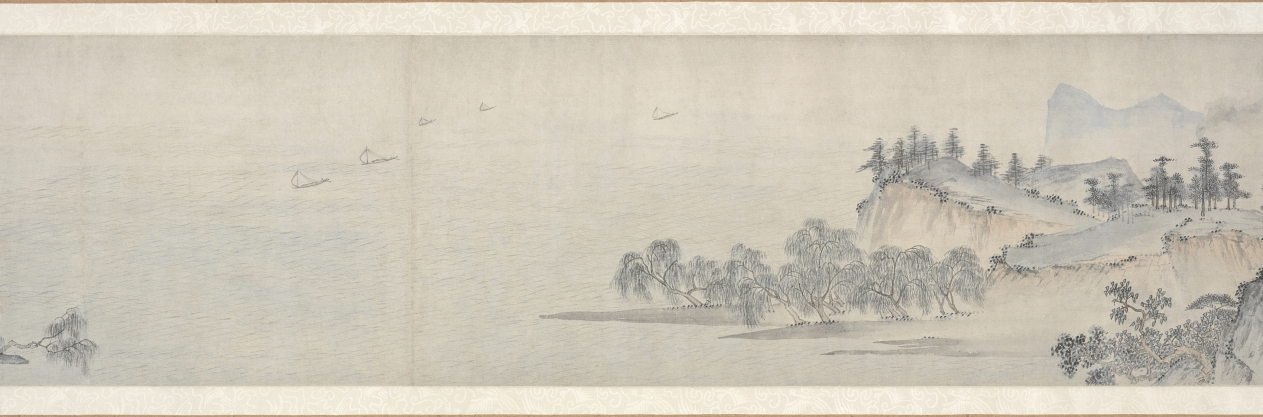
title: Ten Thousand Li of the Yangzi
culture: China, Ming dynasty (1368–1644)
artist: Dai Jin (Chinese, 1388–1462)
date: c. 1400s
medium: Handscroll; ink and color on paper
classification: Painting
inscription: Two colophons at end. Artist's seals: Dai Jin 戴進 and Wenjin 文進.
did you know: Dai Jin is traditionally considered the founder of the Zhe School, a style of landscape painting.